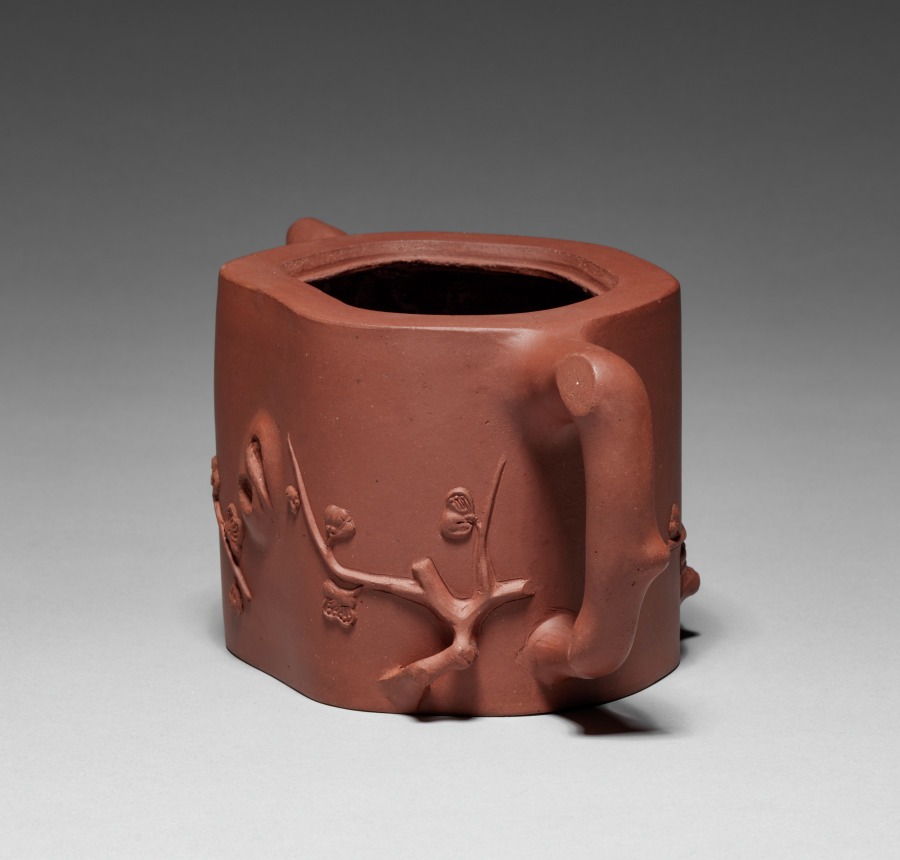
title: Yixing Teapot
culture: China, Qing dynasty (1644-1911)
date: 1800s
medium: stoneware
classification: Ceramic